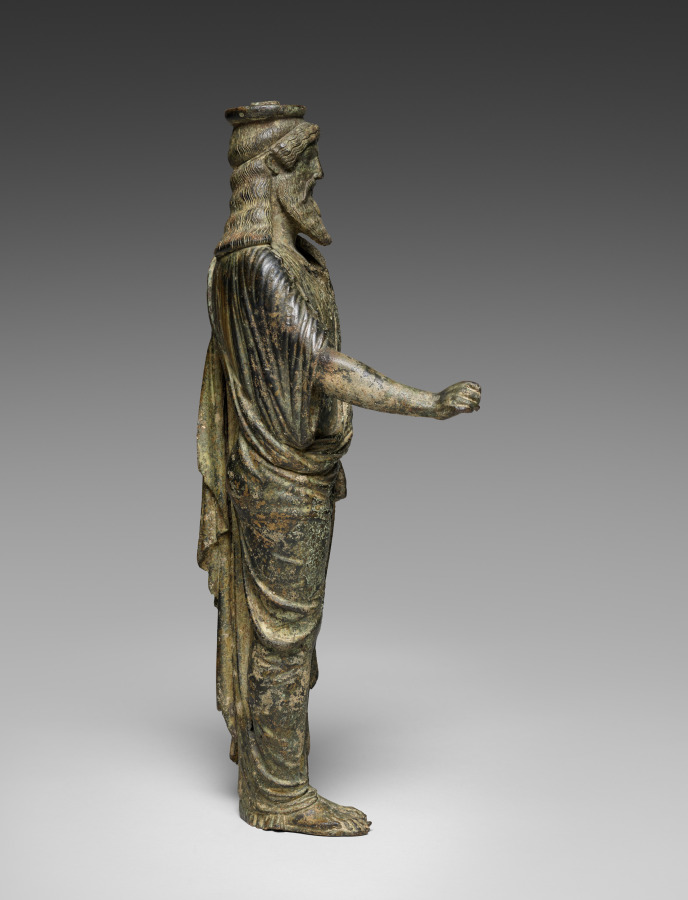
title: Statuette of Dionysos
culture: Italy, Roman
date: 50 BCE–50 CE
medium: bronze and silver and traces of gilding, hollow cast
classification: Sculpture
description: This bronze figure of Dionysos, the god of wine, theater, and the mysteries, is presented in a style recalling Archaic Greek art, most noticeably in his stiff pose and trimmed beard. The more naturalistic folds of his garment speak to a later date, in the Roman period. The disk attached at the top of the head suggests that this figure was once part of an ornate piece of furniture, perhaps a stand or support. In his right hand, the god likely held a kantharos or other attribute. He would have been further embellished with inlaid copper (lips), silver (whites of eyes), and perhaps gilding (garment).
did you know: Over his long, thin garment, Dionysos wears an animal skin, fastened on his left shoulder.